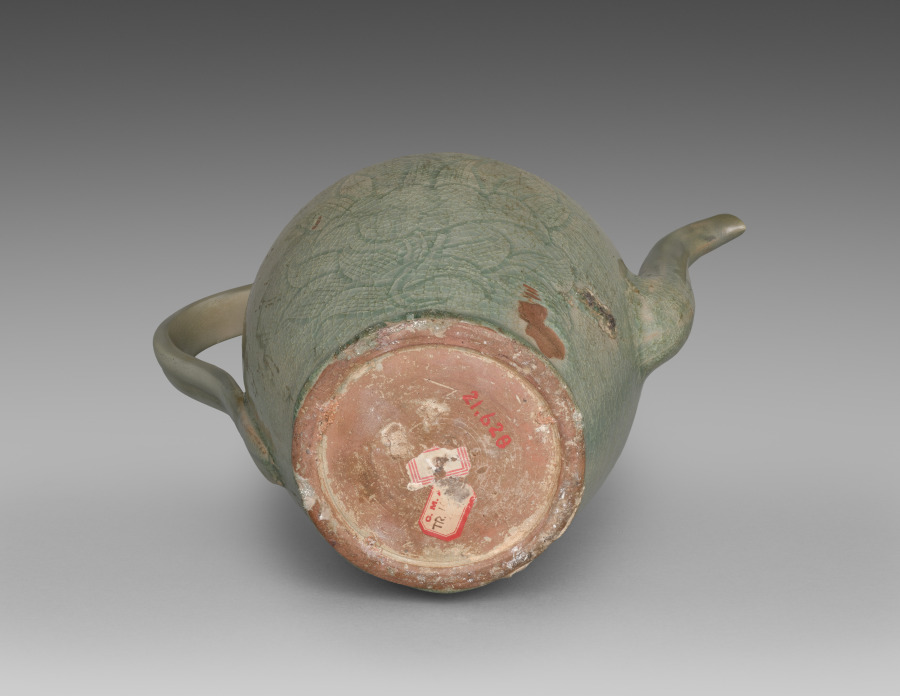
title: Wine Pot with Incised Lotus Design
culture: Korea, Goryeo dynasty (918–1392)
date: 918–1392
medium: celadon ware with incised and carved decoration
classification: Ceramic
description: As early as the seventh century, the practice of drinking tea and wine became an important part of elite culture in Korea. Elites of the Goryeo period commissioned a variety of types of utensils and vessels including this elegant wine pot with the incised image of lotus flowers, not only to make their drinking experience more exciting, but also to show their appreciation of nature.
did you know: A small loop on the handle was intended to secure the lid (now missing) on top of the pitcher through a cord or chain.